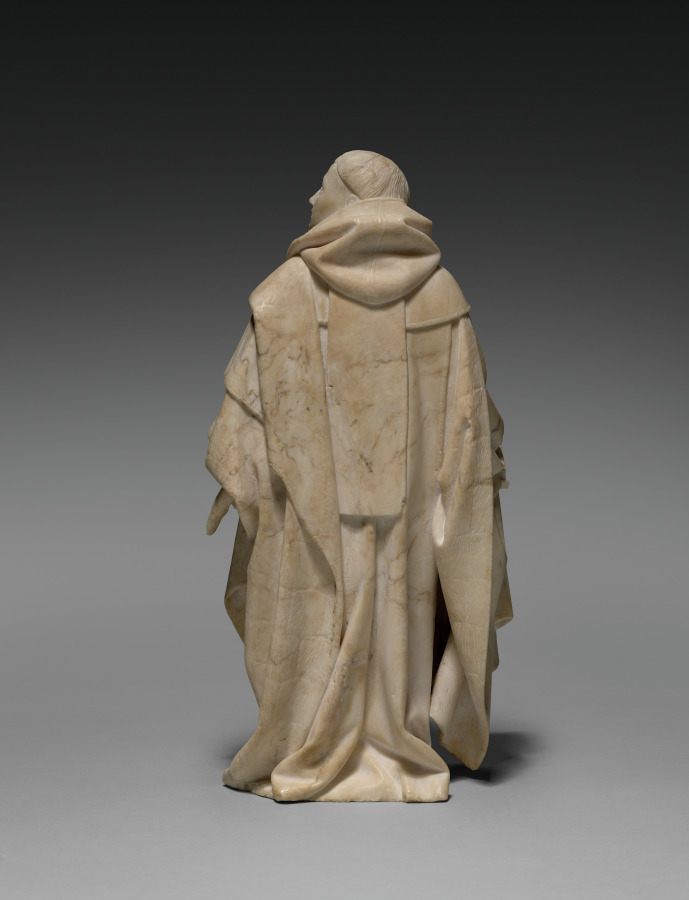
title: Mourner from the Tomb of John the Fearless and Margaret of Bavaria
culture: Spanish, Burgundy, Dijon, 15th century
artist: Jean de la Huerta (Spanish, active Burgundy, 1431–62)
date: 1443–45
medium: salins alabaster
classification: Sculpture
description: This monklike figure has a variously textured monochrome surface. Alabaster’s softness made it easy to carve details like the fabric and fur of the mourner’s robe and the codex pages in his hand. This is one of 40 mourners from an elaborate funeral procession beneath an intricately carved alabaster arcade. This mourner comes from the monastery of Champmol near Dijon, which became a primary burial place for Burgundian dukes. The sculpture was part of the tomb of John the Fearless (1371–1419), commissioned by his son Philip the Good (1396–1467), modeled after the earlier monument for Philip the Bold.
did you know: A plaster cast of this mourner adorns the Tomb of John the Fearless and Margaret of Bavaria in Dijon, France.